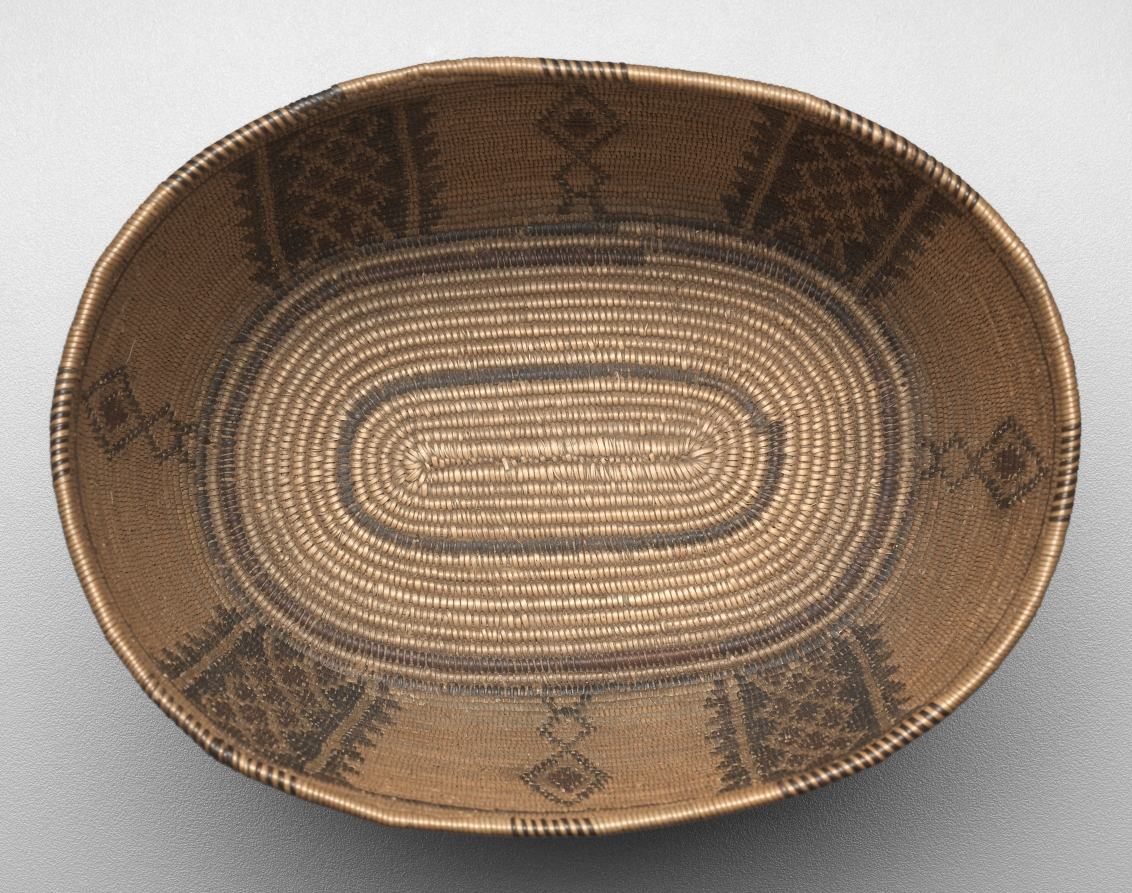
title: Bowl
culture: Great Basin, Timbisha Shoshone (Panamint)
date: c 1900–1910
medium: willow, devil's claw, yucca root; coiled (3 rods)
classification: Basketry